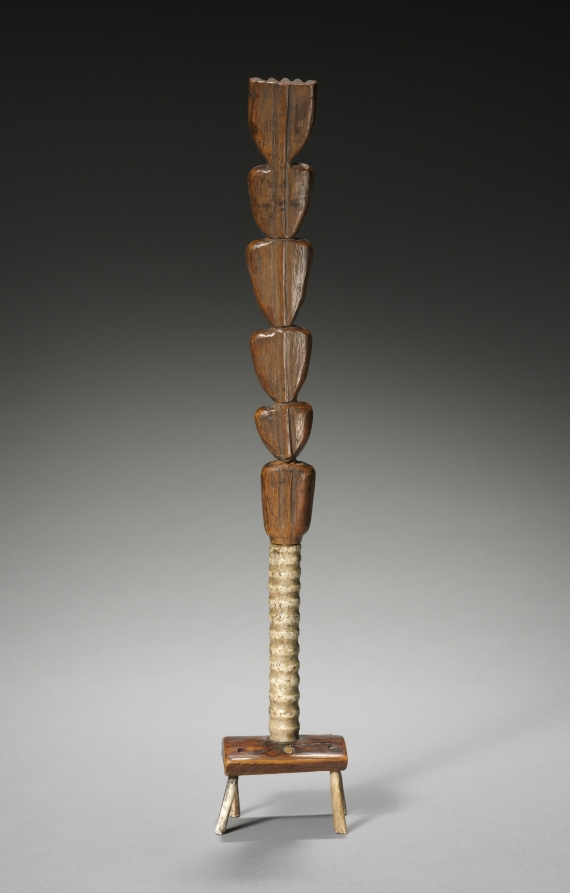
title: Totem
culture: America, North American Indian, Alaska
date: 20th century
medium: wood and bone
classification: Furniture and woodwork